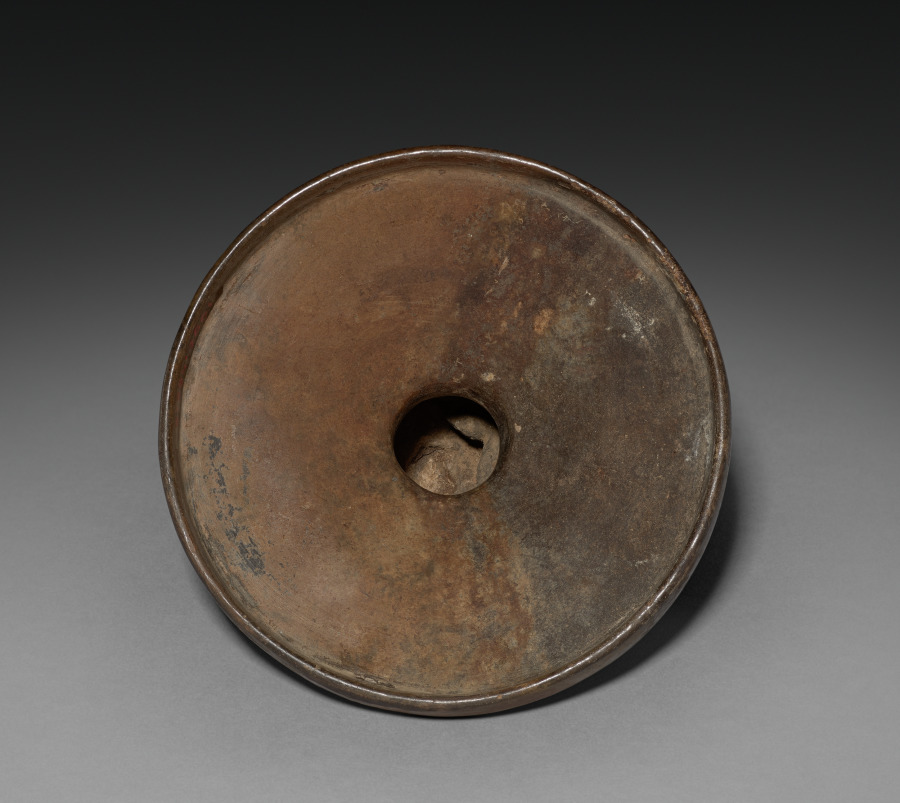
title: Tripod Vessel with Lid (lid)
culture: Mexico or Central America, Maya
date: 250–600 CE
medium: earthenware with pigment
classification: Ceramic